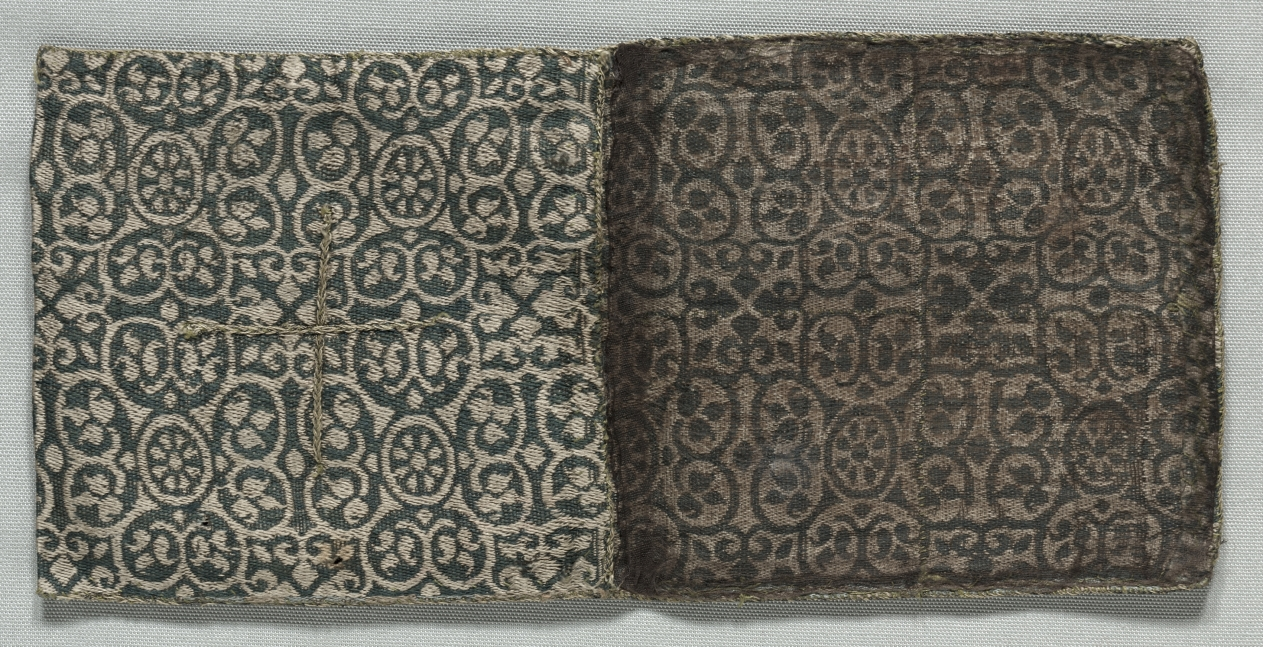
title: Reliquary(?) Bag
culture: Italy or Spain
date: 1200s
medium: silk: compound twill weave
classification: Textile